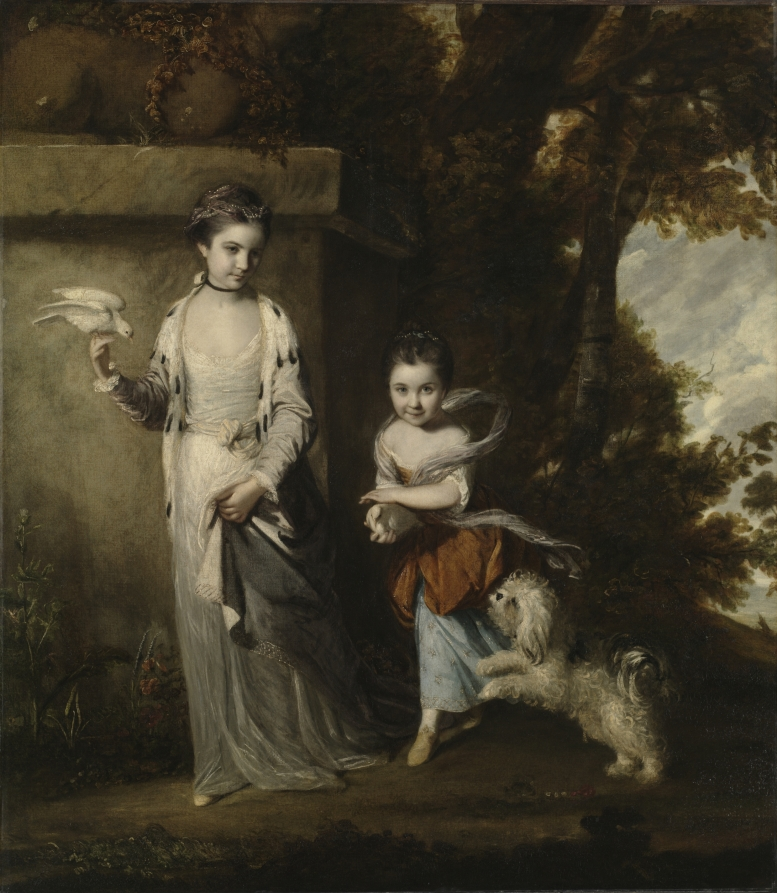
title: Portrait of the Ladies Amabel and Mary Jemima Yorke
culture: England, 18th century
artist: Joshua Reynolds (British, 1723–1792)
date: c. 1761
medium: oil on canvas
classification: Painting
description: Sisters Amabel (left) and Mary Jemima are shown playing on the grounds of their family’s country estate outside London. They wear loose, flowing garments invented specifically for the portrait rather than their usual outdoor dresses. Their father commissioned the painting to hang in the family’s city home in London’s St. James Square and it highlights their status as landowners. Joshua Reynolds painted this portrait after his return from Italy, where his studies inspired him to incorporate classical references. The famous ancient Roman Statue of a Girl with a Dove is echoed in Mary Jemima’s pose as she shields a dove from the family dog.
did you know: Her family affectionately referred to Mary Jemima (at right) as "Mouse."